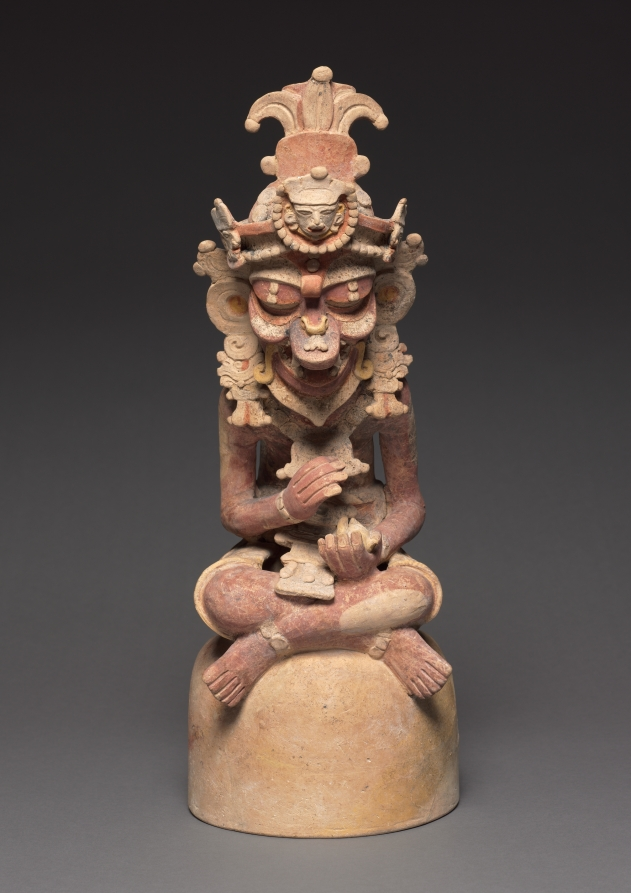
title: Artisan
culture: Guatemala, Petén region, Maya style (250-900), Maya style (250-900)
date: 250–600 CE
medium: earthenware with colored slips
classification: Sculpture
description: These figures represent the supernatural patrons of the visual arts and writing: the brothers Hun Batz and Hun Chuen ("One Monkey" and "One Artisan"). The two were refined artists but also bullies who tormented their younger brothers, who took revenge by transforming their elders into monkeys. Many Maya representations of the painter-scribes immortalize this fate by depicting the pair with both simian and human features, as here. The brothers are shown engaged in artistic or scribal pursuits. Sitting on high-domed bases that may have served as the lids of incense or offering bowls, each apparently once grasped a tool in his upper hand-for instance, a paint brush or a stylus for writing. In the lower hand, one cradles a small mask and the other, a piece of bark that likely refers to the beaten bark from which the Maya made books.